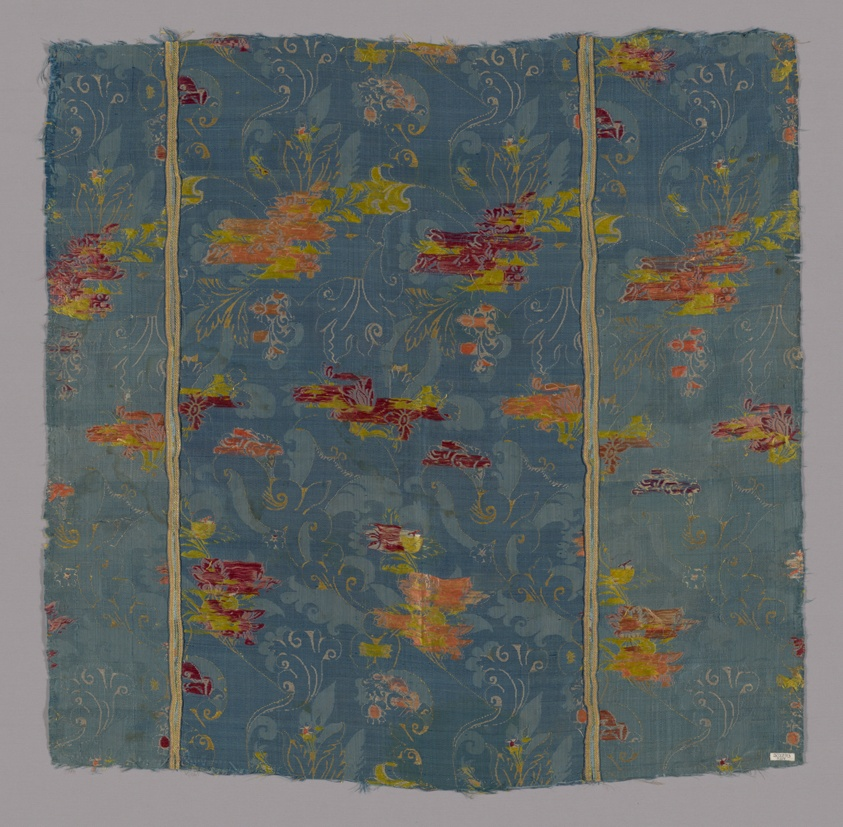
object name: Textile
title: Panel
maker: France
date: c. 1710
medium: Silk, gilt-and-silvered-metal-strip-wrapped silk, warp-float faced 7:1 satin weave with supplementary brocading wefts bound in weft-float faced 3:1 twill interlacings and self-patterned by areas of plain weave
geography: France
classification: textile; weaving